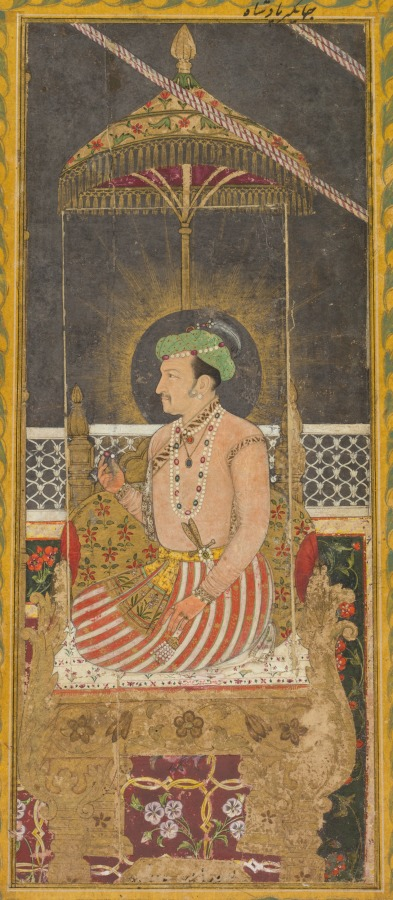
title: Posthumous portrait of Emperor Jahangir under a canopy (recto)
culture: India, Mughal, 17th century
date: c. 1650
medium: Gum tempera, ink, and gold on paper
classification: Painting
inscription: recto: inscription of identification in upper border, partially erased inscription at lower edge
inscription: Persian inscription above, in inner border, in nasta‘liq script: Great King Jahangir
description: Jahangir, the fourth Mughal emperor, was remembered for his greatness long after his death. Ruling from 1605 to 1627, he laid the foundations for long-term trade and diplomatic relations with various nations of Europe, most notably England and Portugal. He oversaw the transition of Mughal India into a global power during a time that can be considered the international Age of Exploration. This posthumous portrait depicts Jahangir amid the trappings of wealth and power with the light of divine sanction shining behind his head. A white marble railing demarcates his imperial space.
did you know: Jahangir holds a ruby or spinel, thought to be a talisman for military victory.